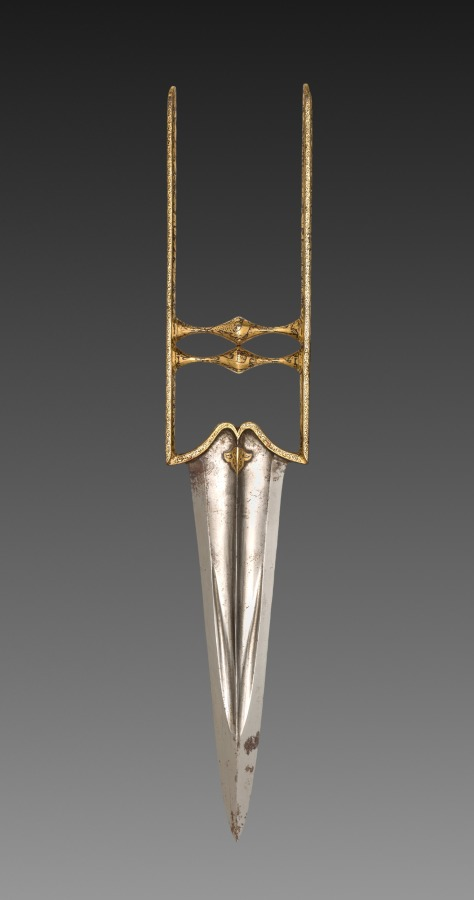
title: Katar (Stabbing Dagger)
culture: India, Mughal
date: 1700s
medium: Iron handle with gold inlay; steel blade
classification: Arms and Armor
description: Stabbing daggers called katar were distinctive to India and often worn by soldiers and courtiers, tucked into their belts. Covering the entire handle are tiny scenes of lions and cheetahs hunting deer and buffalo in rocky wooded settings.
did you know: The ornament on the handle faces up from the perspective of a right-handed user, on all sides.